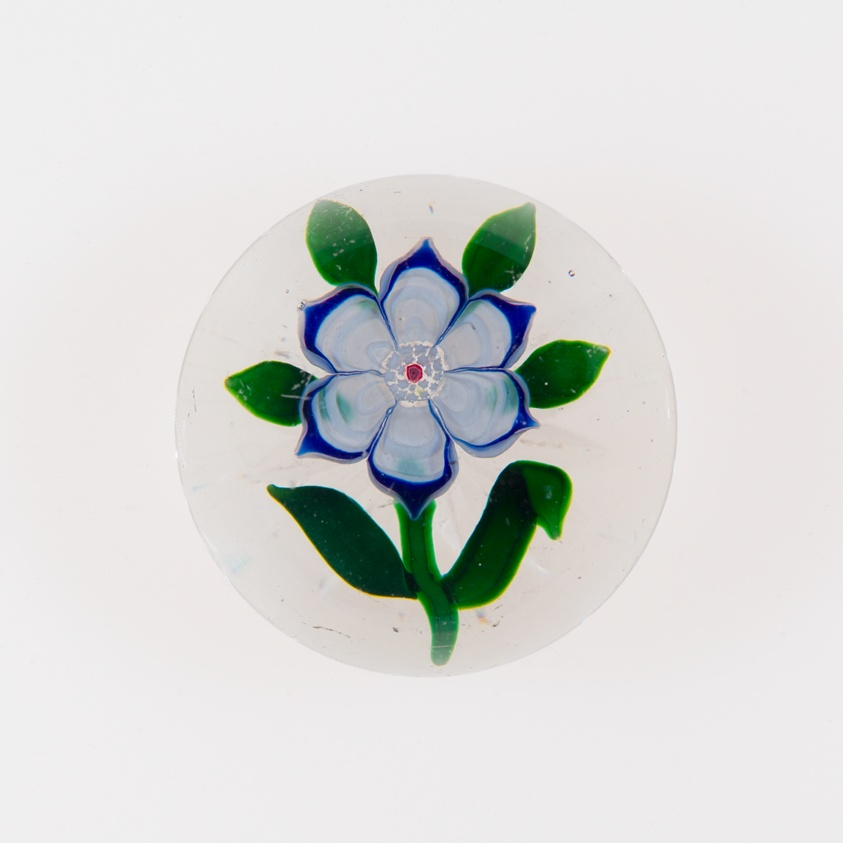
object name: Glass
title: Paperweight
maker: Baccarat Glassworks (Cristalleries de Baccarat); Lorraine, France, founded 1764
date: c. 1845–60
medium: Glass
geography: Baccarat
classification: paperweight; glass